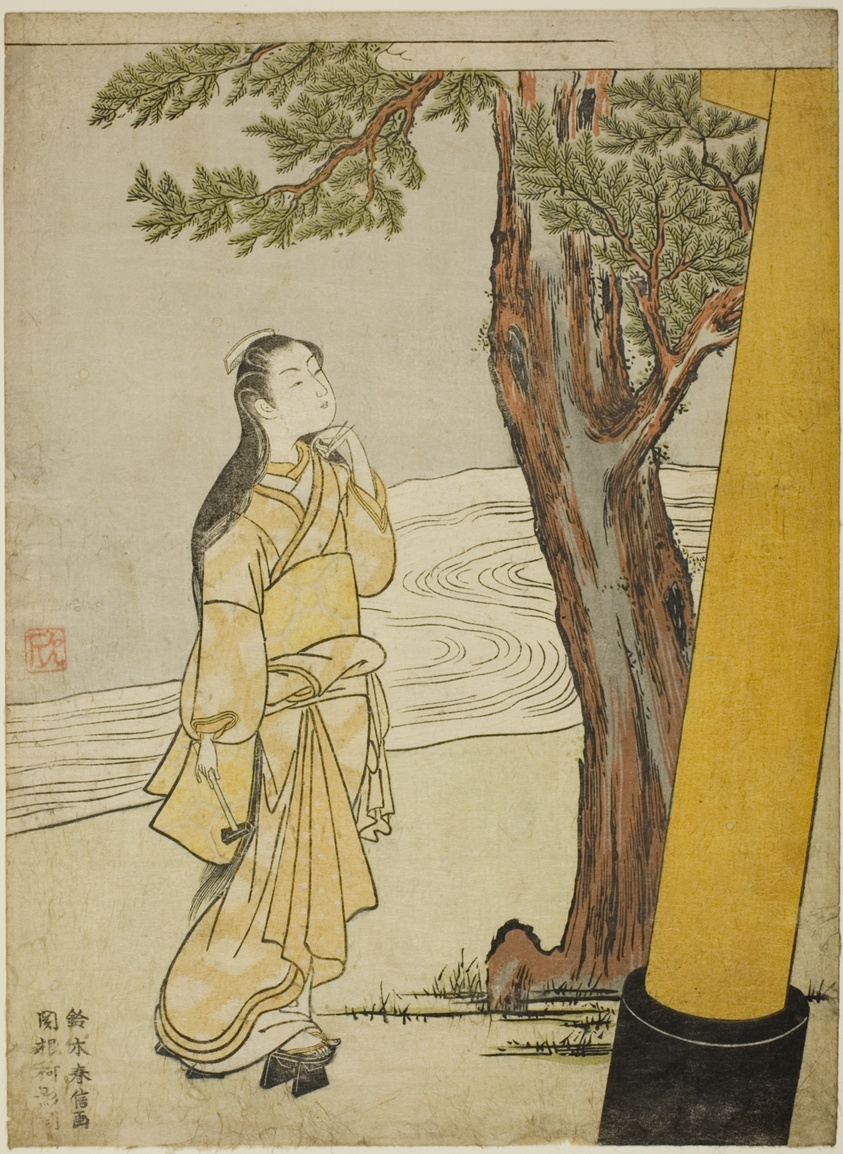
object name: Print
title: Casting a curse at the hour of the ox (ushi no koku mairi)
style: Japanese (culture or style)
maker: Suzuki Harunobu 鈴木 春信; Japanese, 1725 (?)-1770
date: 1765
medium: Color woodblock print; chuban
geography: Japan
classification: woodblock print; print; asian art